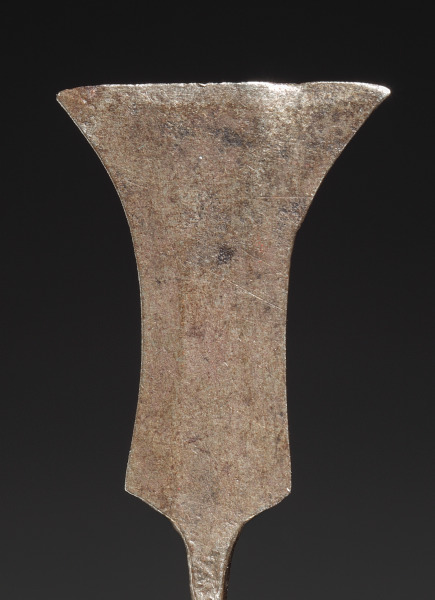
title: Hair Ornament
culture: Africa, Central Africa, Democratic Republic of Congo, Luba-style maker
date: Unassigned, before 1915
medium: Iron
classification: Jewelry